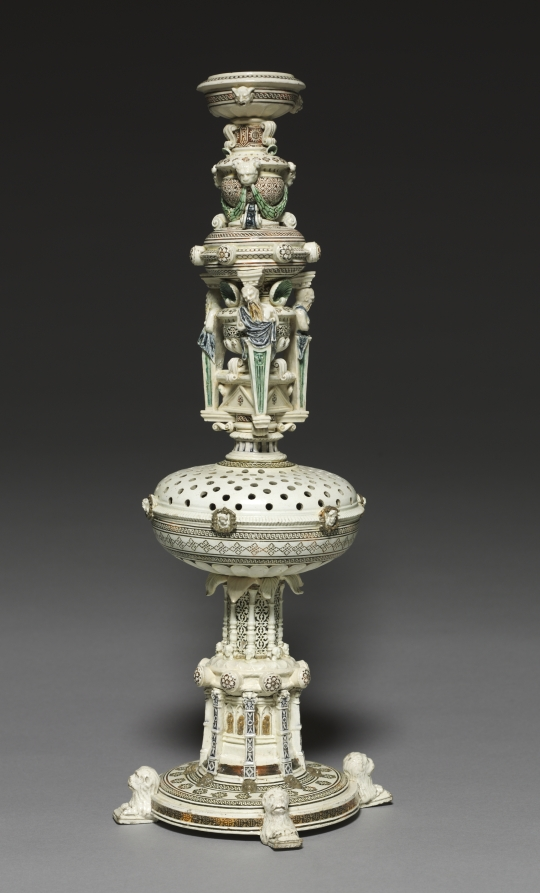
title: Flower Vase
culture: France, 16th century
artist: Saint-Porchaire (French)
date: c. 1520–1540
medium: lead-glazed white-paste earthenware, molded and inlaid slip decoration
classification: Ceramic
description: Made as two separate elements, this extremely rare example of Saint-Porchaire ware may have been conceived primarily as a tour de force of decorative art.